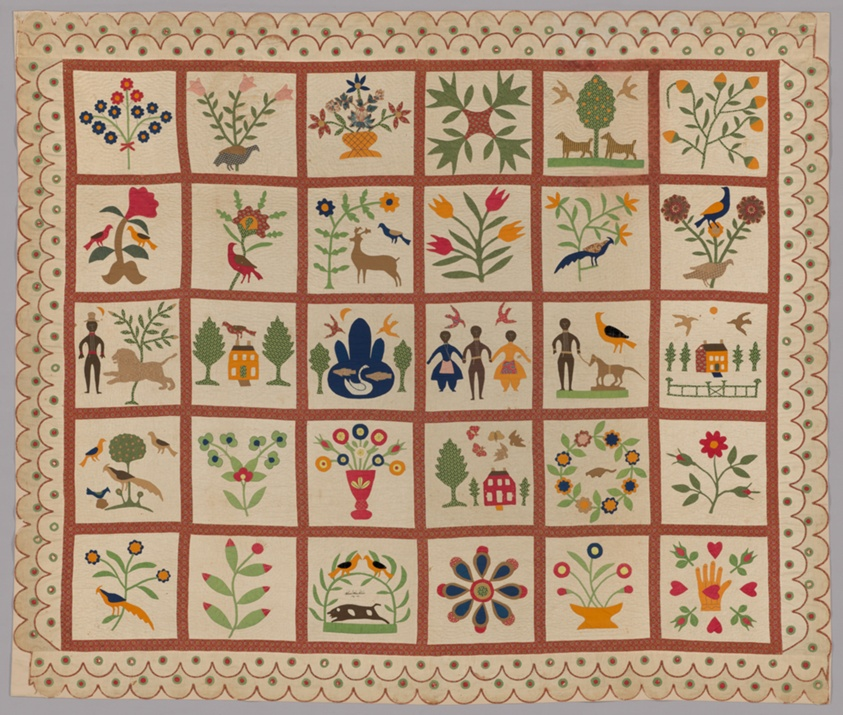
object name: Textile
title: Album Quilt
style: 19th century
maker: Sarah Ann Wilson (American, active mid-19th century); New York or New Jersey, United States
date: 1854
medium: Appliquéd, pieced and embroidered quilt; dyed, undyed and printed cotton plain weave fabrics and cotton and silk velvet fabric; cotton embroidery threads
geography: New York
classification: needlework - quilt; textile; embroidery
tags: floral patterns, heart shape, circles, squares, bird, fish, boars, deer, lions, animals, houses, people, trees, flowers